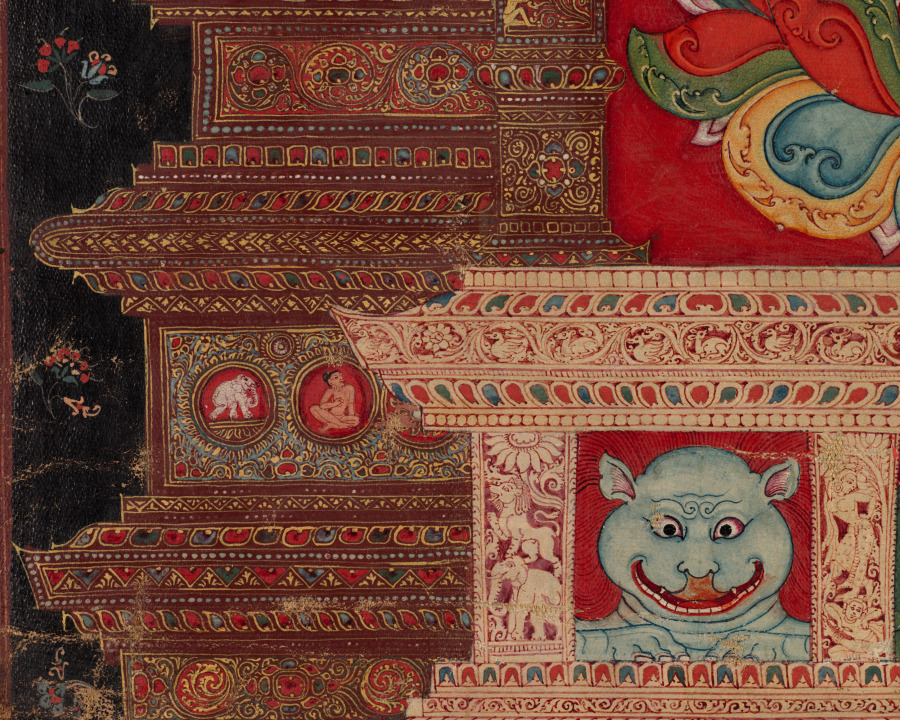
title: Green Tara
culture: Central Tibet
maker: attributed to Aniko (Nepalese, active in Tibet mid- to late 1200s)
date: c. 1260s; mounted, 2020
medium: thangka; gum tempera, ink, and gold on sized cotton; mount: silk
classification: Painting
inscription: Om Ah Hum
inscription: om tare tutare ture svaha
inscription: Om Ah Hum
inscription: Om Ah Hum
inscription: om ah sarva vyida svaha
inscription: ye dharmā hetuprabhavā he- tuṃ teṣāṃ tathāgato hy avadat teṣāṃ ca yo nirodha evaṃvādī mahāśramaṇaḥ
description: For Tibetans, Green Tara is one of the preeminent figures of their Buddhist faith, a radiant savioress who embodies the female form of the perfect, enlightened mind. The Green Tara in the Cleveland thangka—a Tibetan devotional painting on cloth—specifically dispels fear and provides protection, just like her mantra inscribed on the back side of the painting. Her green color and fear-not gesture link her to the cosmic Buddha of the North, enshrined above her head. Most scholars agree that this work was painted by the celebrated Nepalese artist known as Aniko.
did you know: The tiny monastic figure under Green Tara's right hand commissioned the painting.